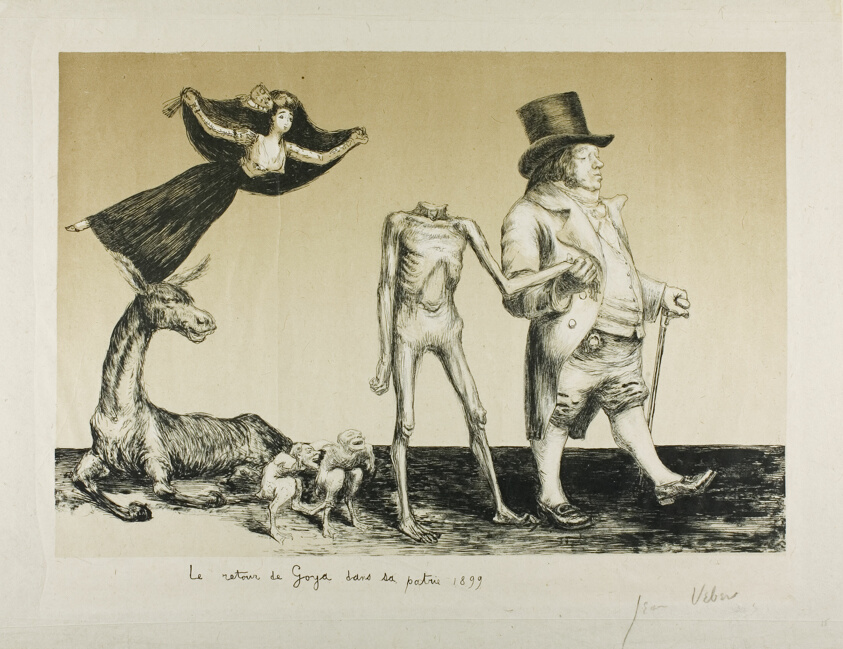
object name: Print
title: Goya's Return to his Homeland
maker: Jean Veber (French, 1864-1928)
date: 1899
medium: Lithograph from two stones in black (pen and crayon) and beige (tint) on grayish-ivory China paper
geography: France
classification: lithograph; print; prints and drawing